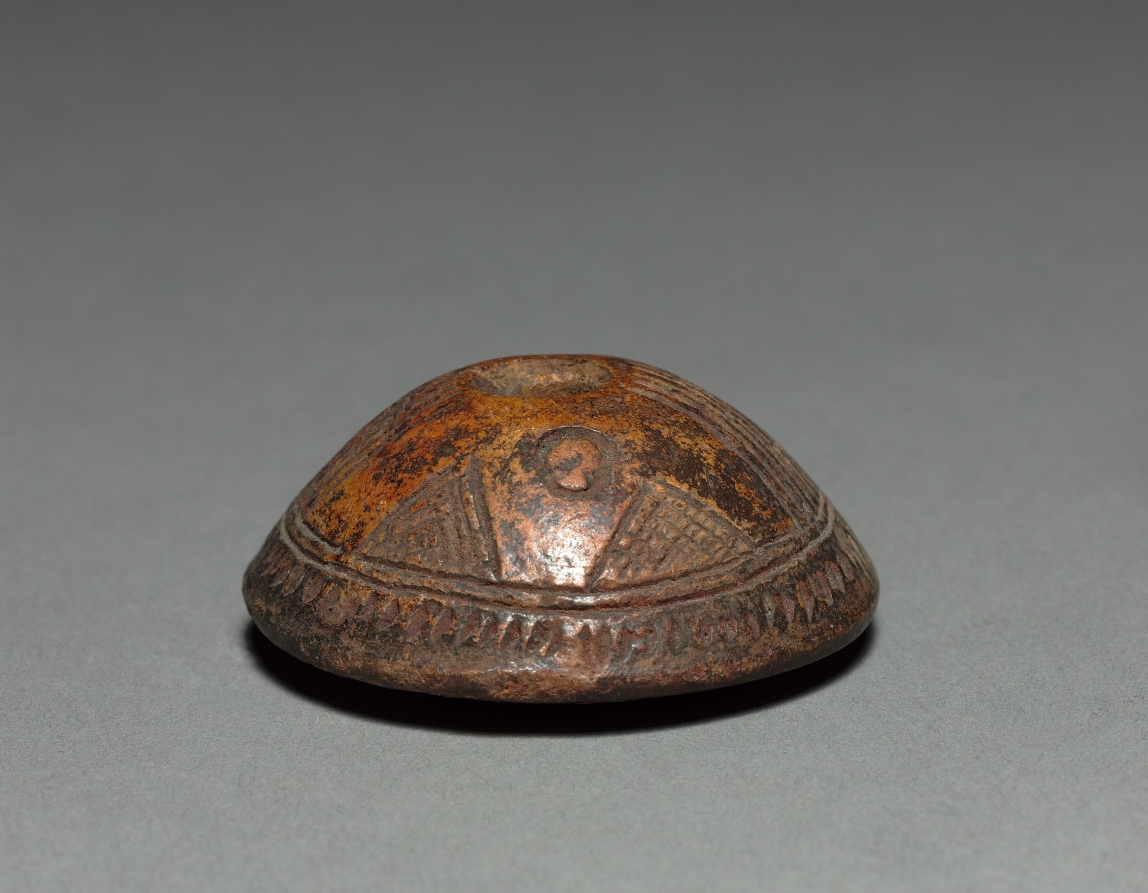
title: Spinning Whorl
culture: Colombia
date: before 1921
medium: red ware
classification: Ceramic